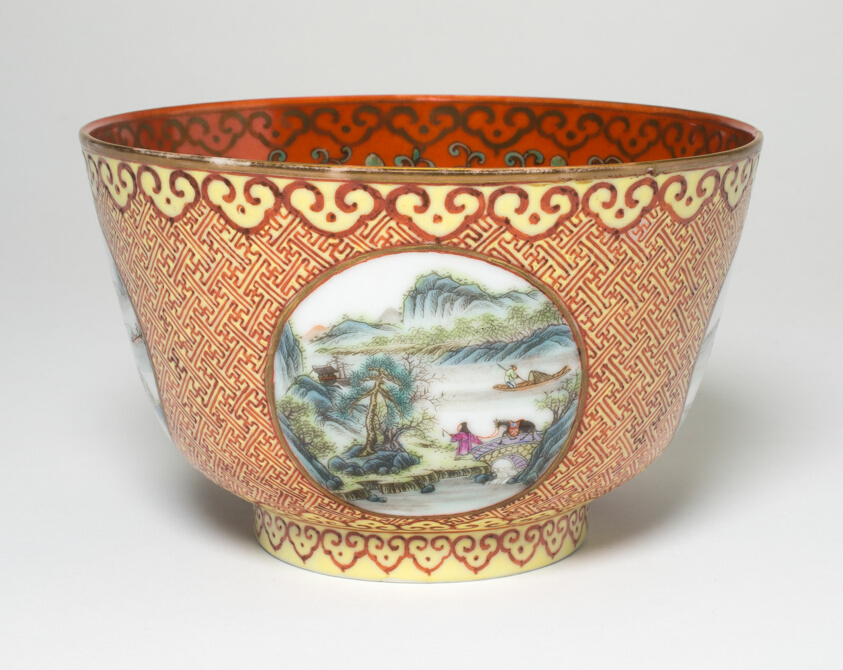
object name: Vessel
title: Bowl with Four Panels of Landscape Scenes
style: Chinese (culture or style)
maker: China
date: Qing dynasty (1644–1911), probably 19th century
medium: Porcelain painted in overglaze enamels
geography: China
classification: bowl; porcelain; dish (vessel); asian art; ceramics; vessel